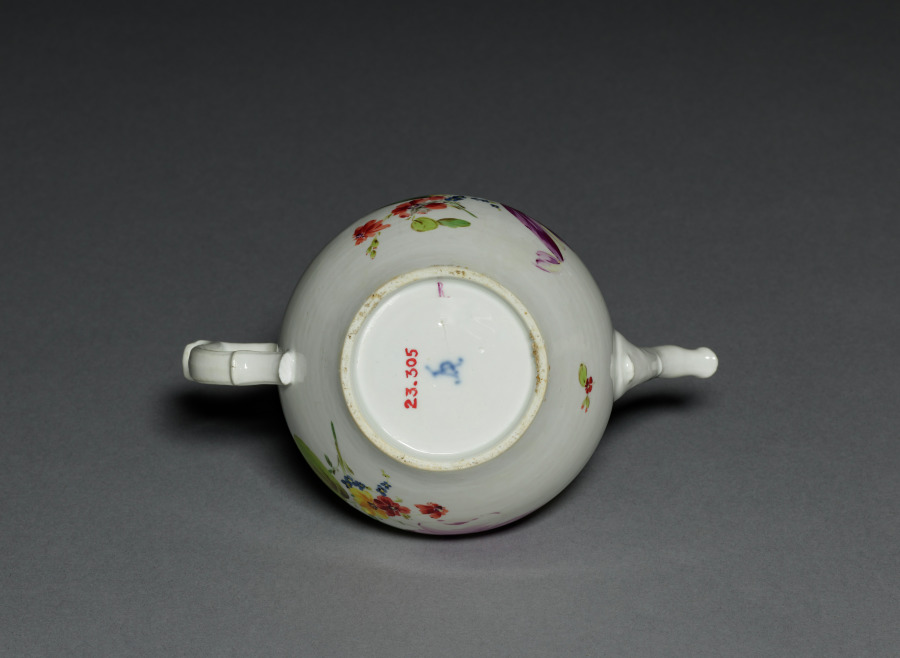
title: Teapot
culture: Germany, late 18th century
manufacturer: Kloster-Veilsdorf Porcelain Factory (German)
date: late 1700s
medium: porcelain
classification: Ceramic